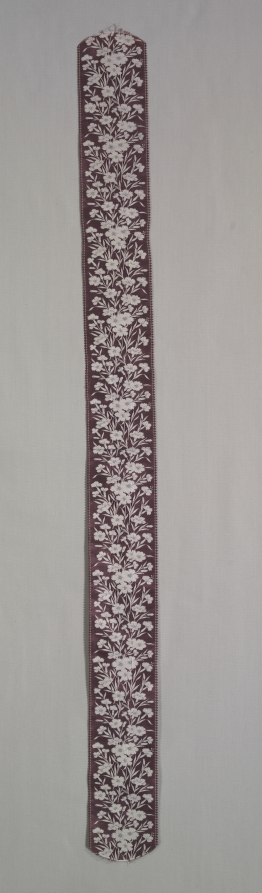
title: Ribbon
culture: France, Late 19th Century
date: c. 1890s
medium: silk, damask weave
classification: Textile